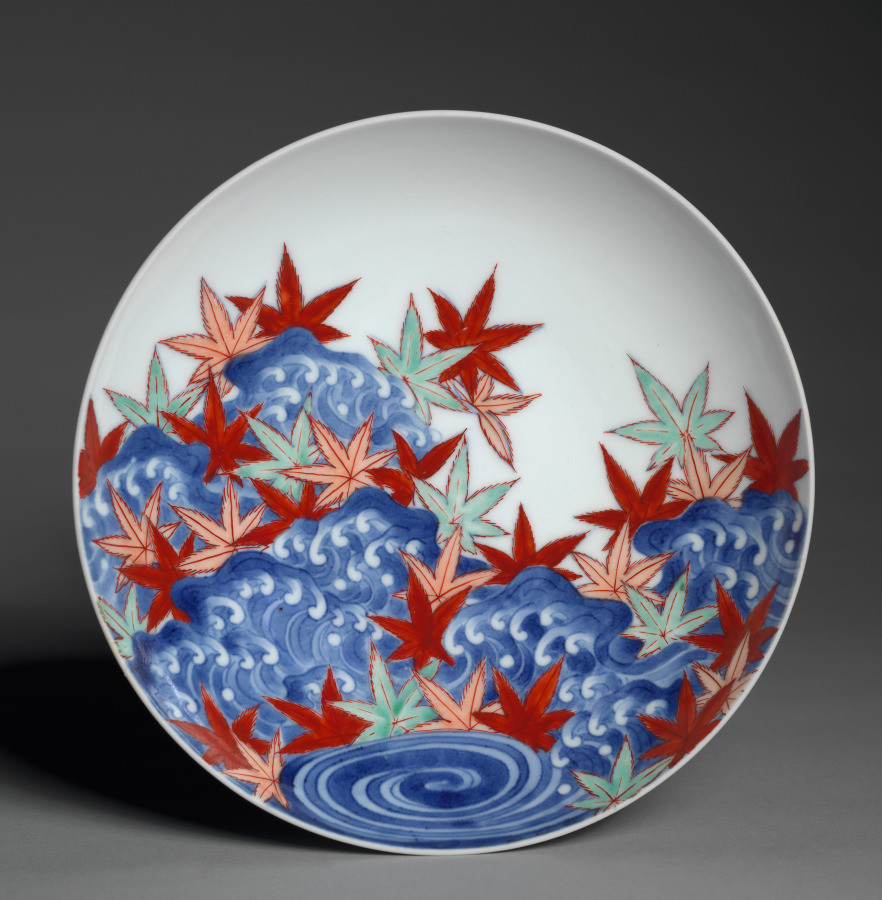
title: Dish with Maple Leaves in Waves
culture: Japan, Edo period (1615–1868)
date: late 1600s–early 1700s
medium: Porcelain with underglaze blue and overglaze color enamel (Hizen ware, Nabeshima type)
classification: Ceramic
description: The dish is an example of the finest type of Japanese porcelain, Nabeshima-type Hizen ware. It is decorated with maple leaves in iron-red and green and yellow enamels floating on the rough waters of a fast flowing stream in underglaze blue. It has been associated with the classical poetry motif of maple leaves on the Tatsuta River in Nara Prefecture.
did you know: This pottery type was named for the Nabeshima family, who established kilns to produce highly refined porcelain meant for diplomatic gifts.